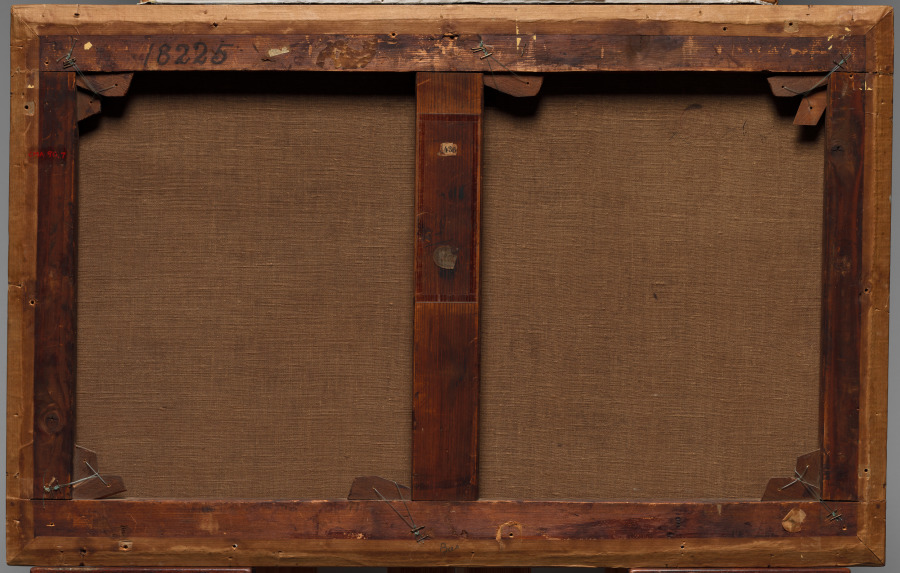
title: The Lock at Pontoise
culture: France, 19th century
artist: Camille Pissarro (French, 1830–1903)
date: 1872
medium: oil on fabric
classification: Painting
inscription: Signed lower left: C. Pissarro 1872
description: Pissarro was instrumental in developing the radically new Impressionist technique of painting quickly outdoors to capture fleeting effects of light and atmosphere. The rushing water and overcast sky in this view of a river lock near the artist’s home at Pontoise, a rural commune about 17 miles northwest of Paris, are rendered with rapid, broken brushstrokes of pure color. Painting directly on canvas without preliminary drawing, Pissarro may have executed this work in a single session. The shimmering surface of broken color conveys the sensation of natural, outdoor light.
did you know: The river portrayed here is 212 miles (341 km) long.